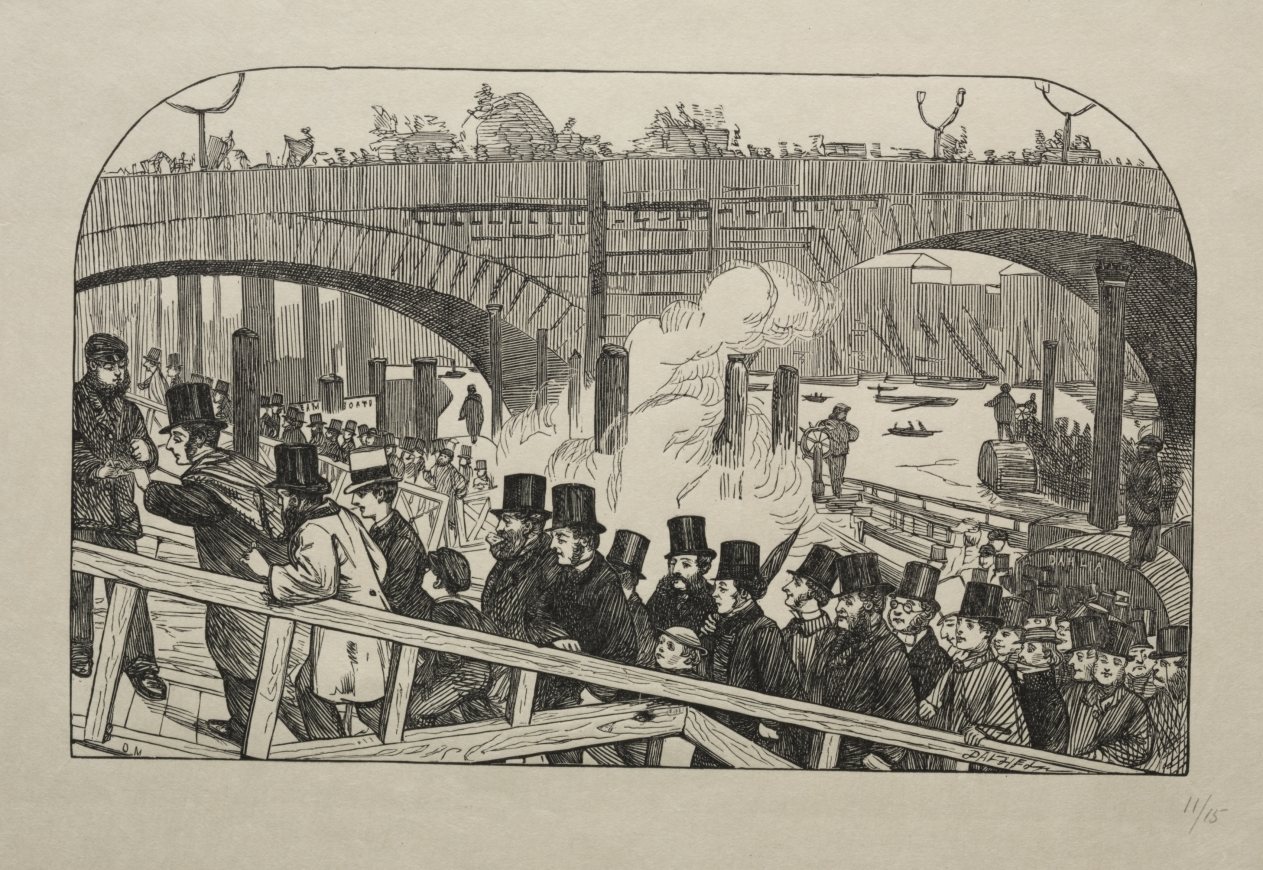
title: The Living Stream at London Bridge - Under the Bridge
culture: England, 19th century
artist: George Louis Palmella Busson Du Maurier (British, 1834–1896)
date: 1863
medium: wood engraving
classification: Print